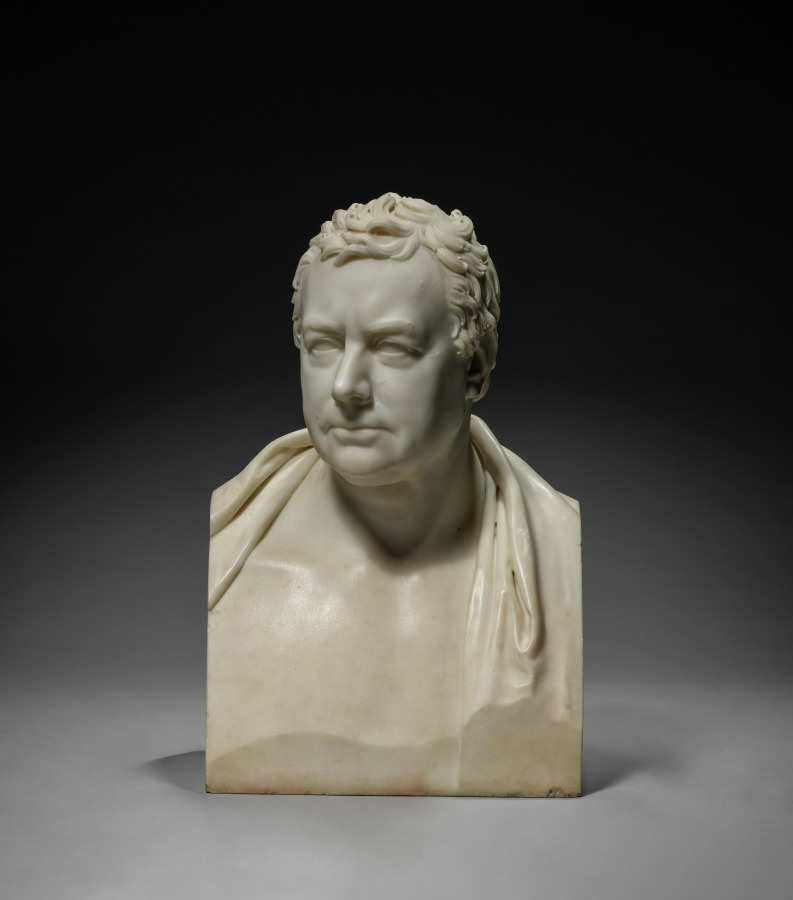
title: Sir H. C. Englefield, Bart.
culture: England, 19th century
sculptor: Francis Legatt Chantrey (British, 1781–1841)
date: 1818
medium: marble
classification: Sculpture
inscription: inscribed left side: Chantrey/Sculptor/1818; rear: Sir H. C. Englefield, Bart.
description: To modern eyes, a bare-chested portrait of a man in his mid-60s might seem undignified. However, it was fashionable for gentlemen of Englefield’s generation to be portrayed in this manner, deliberately referencing the antique sculptures of Roman statesmen they admired. As a Catholic, Englefield was barred from taking part in politics in England; however, he was a member of several clubs devoted to the amateur study of art, science, and history. Among these were the Society of Dilettanti, which championed the works of antiquity and promoted the creation of modern art in the same spirit—like this marble bust by celebrated sculptor Francis Legatt Chantrey.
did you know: Initially, Chantrey tried to establish himself as a portrait painter. After 1805, he painted only on occasion and from 1811–20, he became the leading portrait sculptor in Regency Era Great Britain.